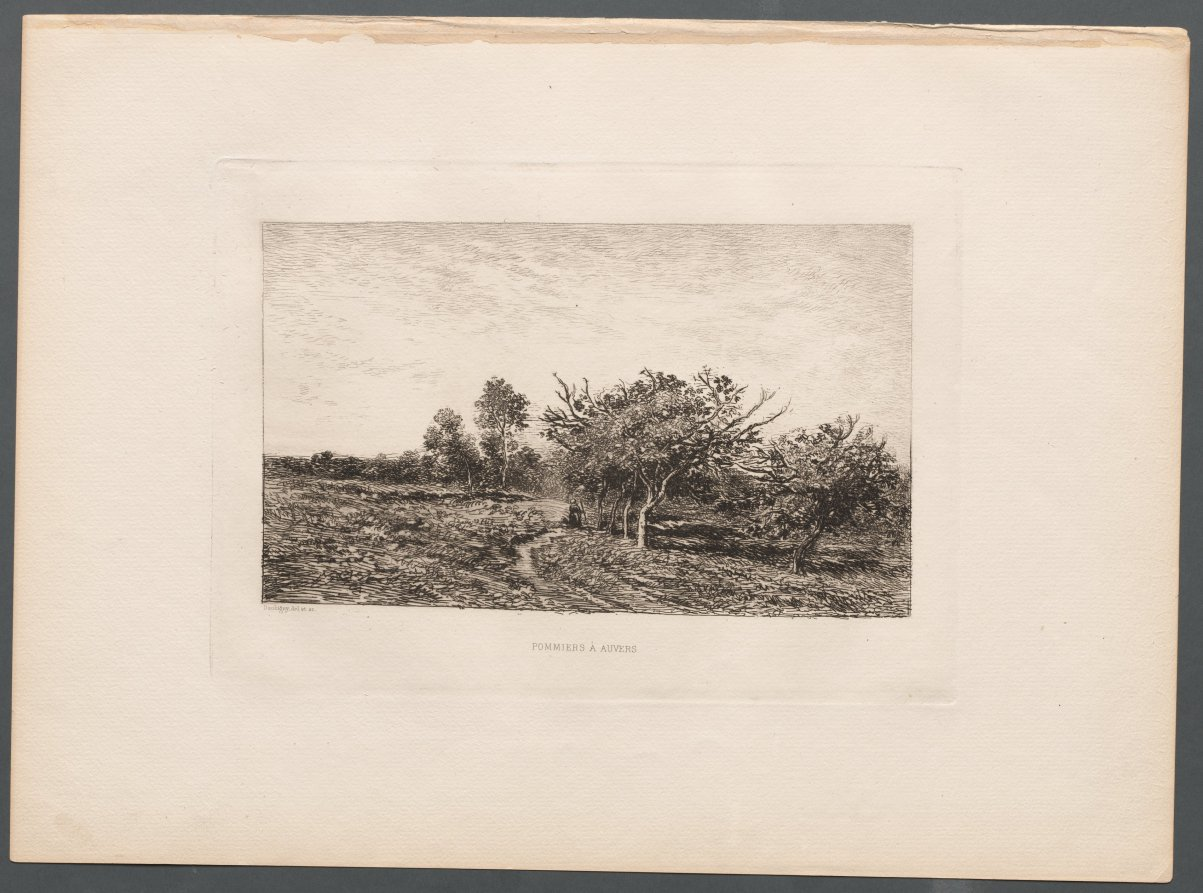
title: Apple Trees at Auvers (Pommiers à Auvers)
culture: France, 19th century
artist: Charles François Daubigny (French, 1817–1878)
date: 1877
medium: etching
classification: Print